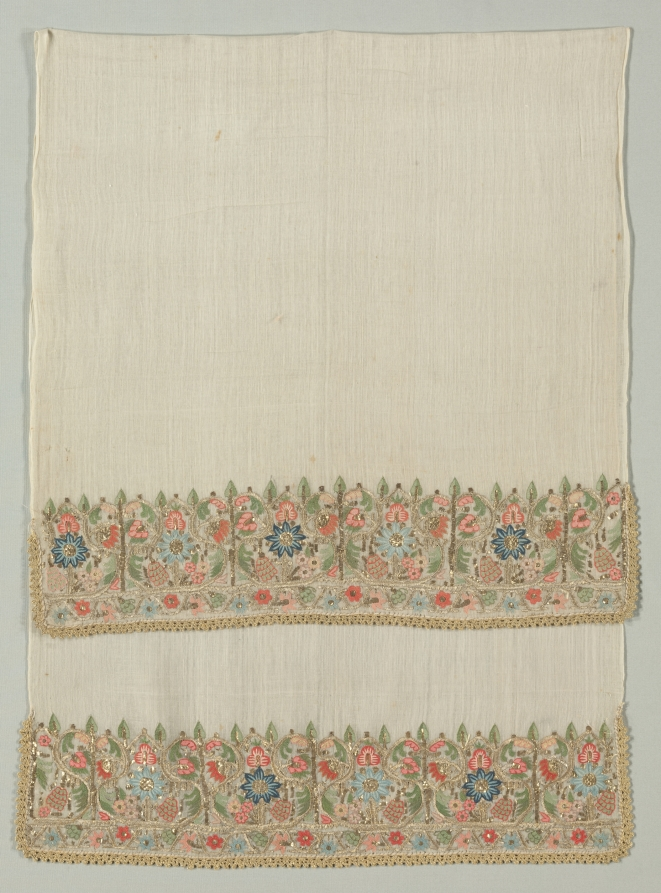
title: Embroidered towel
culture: Turkey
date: 1800s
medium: plain weave: linen; embroidery, double-running stitch: silk, gilt-metal strips and thread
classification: Embroidery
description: Fine Turkish towels with beautiful floral decoration embroidered across each end are often reversible, and their quality revealed the owner’s wealth and status. A lady was required by Turkish etiquette to use a napkin “daintily over the tips of her fingers,” lest she lose her social standing. Towels were not only essential components of everyday life but also gifts, prizes, and decorations. Embroideries could also depict images of daily life. Colorful tents and buildings in floral landscapes, here enriched with shiny gilt-metal strips, adorn the four sides of a head scarf that was worn either folded or unfolded and fastened beneath the chin. Square embroideries also served to wrap gifts, letters, and objects; the 19th-century English traveler Charles White commented that “no present is made . . . unless folded in a handkerchief, embroidered cloth, or piece of gauze. The more rich the envelope, the higher the compliment to the receiver.”